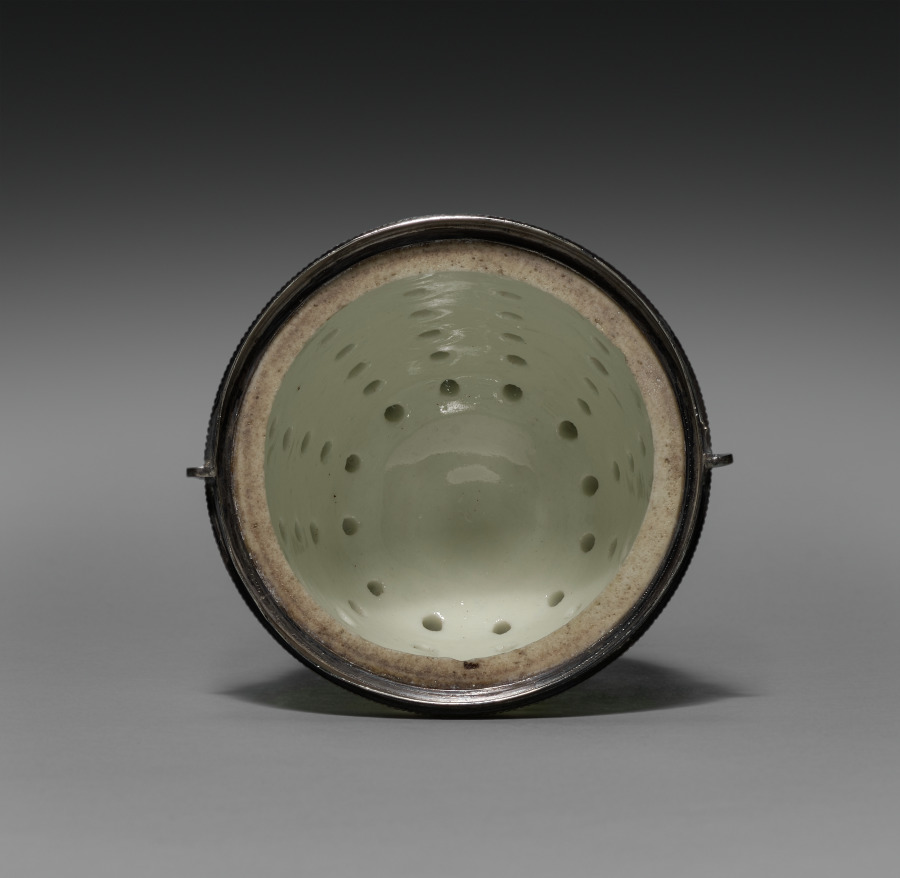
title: Sugar Caster (cover)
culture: France, Saint Cloud, 18th century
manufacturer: Saint Cloud Porcelain Factory (French)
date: c. 1732– 1738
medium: soft-paste porcelain, silver mount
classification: Ceramic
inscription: [Discharge mark of Hubert Louvet, 1732-1738 (Dog's head in profile), on both sections of silver mount]